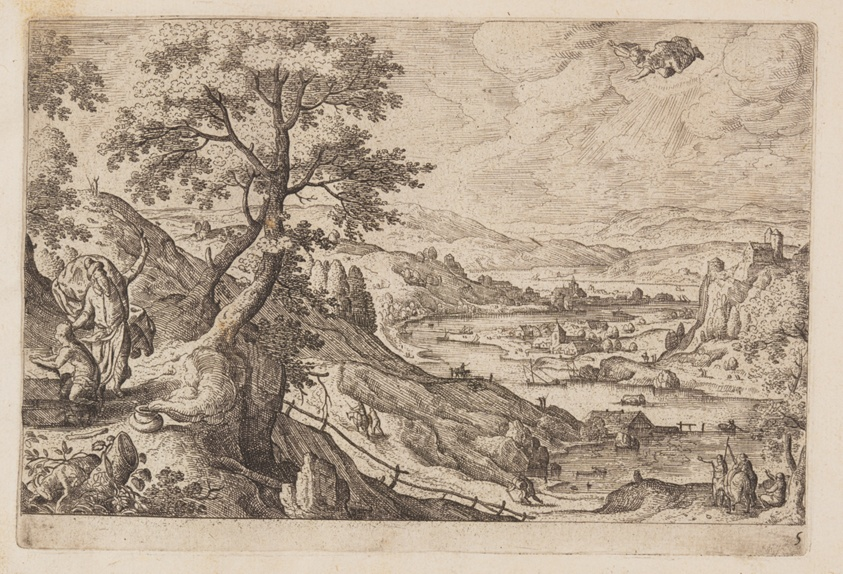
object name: Print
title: Plate 5, from Landscapes with Scenes from the Old and New Testament and Ovid’s Metamorphoses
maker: Hans Bol (Flemish, 1534–1593); published by Philip Galle (Flemish, 1537–1612)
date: 1574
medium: Etching on ivory laid paper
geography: Flanders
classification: print; paper; prints and drawing; etching